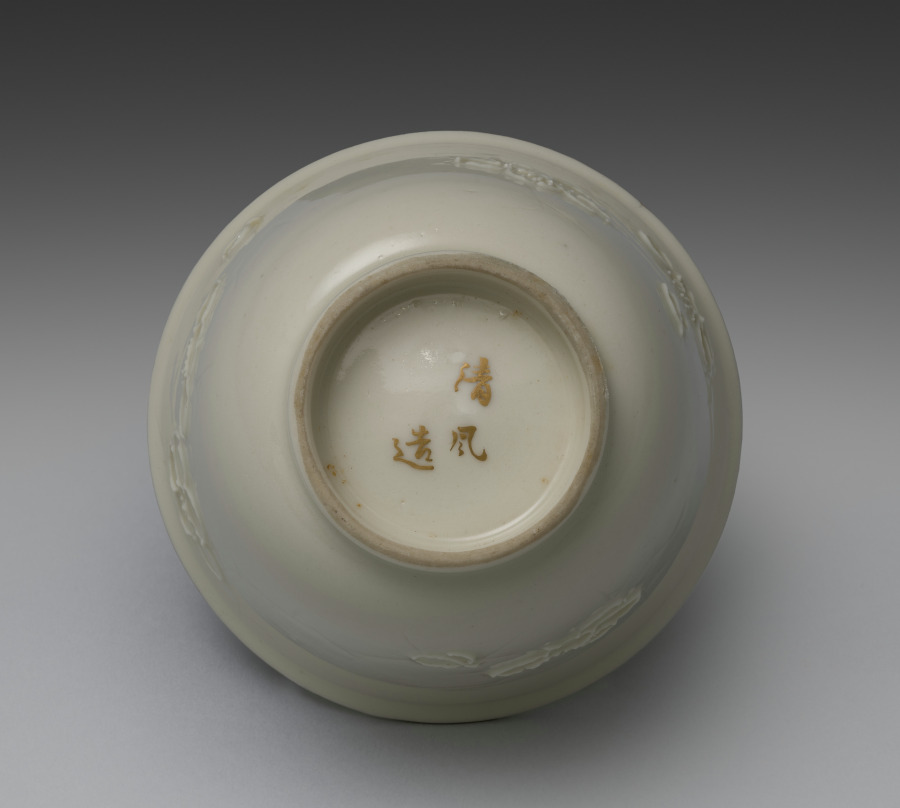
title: Drinking Cup from Dining Set with Plum Blossoms and Cracked-Ice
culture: Japan, Meiji period (1868–1912)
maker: Seifū Yohei II (Japanese, 1844–1878)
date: c. 1875–78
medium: Porcelain with molded designs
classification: Ceramic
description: Each item in this set has a delicate low-relief design of flowering plum branches over scattered, intersecting lines meant to resemble the cracked-ice surface of a frozen body of water and is signed on the base in gold pigment. While Yohei II produced many fine works in underglaze blue, like those produced by Kiyomizu Shichibei, he also made works in quite different styles later in his career, from the early 1870 s. In 1873, he was appointed purveyor to the Industrial Center of Kyoto Prefecture, a designation associated with Kyoto’s efforts to reach an international market through the port of Kobe; and from 1875 until his death, he was involved in national-level projects to present Japanese ceramics across the world. It was during this period that Yohei III was apprenticed to Yohei II, and it has been suggested that this set may in fact be an early example of Yohei III’s work, which he signed with his teacher’s name. Decorated with flowers resembling Japanese textile motifs, the set calls to mind the design of Yohei II’s pair of vases with plum blossoms in the Victoria and Albert Museum. Here, the elaborate trees created for a formal public exhibition setting have been translated into the approachable blossoms of the genteel domestic environment. While the designs are consistent across the pieces, each raised flower petal and pistil and each incised line in the ice was done by hand, so the cups, bowls, and dishes are similar yet unique. The bottoms of two boxes once identified the set’s owner, but the information has been deliberately obscured with black ink. However, inscriptions still visible appear to indicate two occasions, once at the end of July 1886 , and once again in June 1916 , when parts of the set were requested from Hokura in Niigata Prefecture. The location corresponds to a neighborhood in the present-day city of Jōetsu. The surname Tsuji 辻 also appears on a paper tag affixed to one of the box cloths. Future research may possibly reveal more about their provenance. A vase by Yohei III in a private collection combines the formal grandeur of the Yohei II vases in the Victoria and Albert Museum with the gentler design of this dining set, placing flowering plum trees against soft, scalloped-edge clouds resembling those in golden screens.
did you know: The dining wares have a creamy white coloration that the four boxes containing them identify as Korean in style.